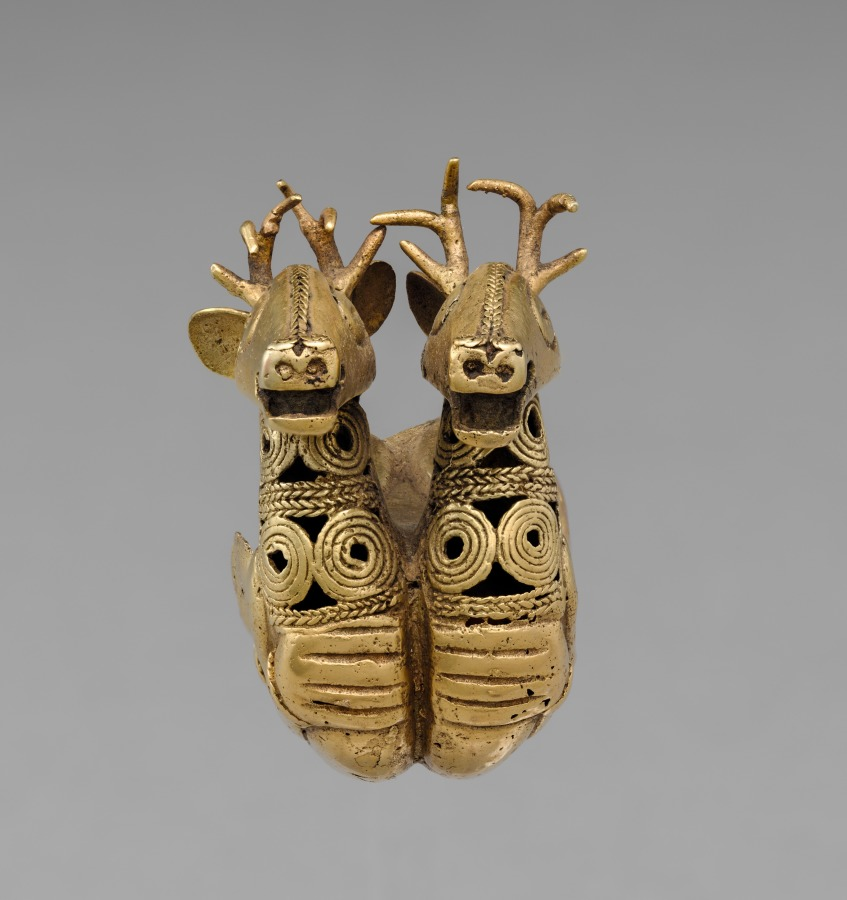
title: Finial with Two Deer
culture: Isthmian Region (Colombia), Sinú (Zenú), 5th century-11th century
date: 400–1000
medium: gold, cast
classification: Metalwork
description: Unique to Colombia's Sinú region are gold finials with sculptural images at right angles to thimble-like caps; the caps fit over the end of a staff, an emblem of rank that may have been held horizontally. This impressive finial features two deer (or a single creature with two deer heads) that hold human-like hands over their chests. Sinú animal imagery is understudied but may relate to beliefs about the cosmos. For instance, contemporary natives attribute importance to birds because they have the capacity to move among different environments (air, land, water); they may have been regarded as mediators among levels of the cosmos.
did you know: This exquisite finial was made using the lost-wax casting process.